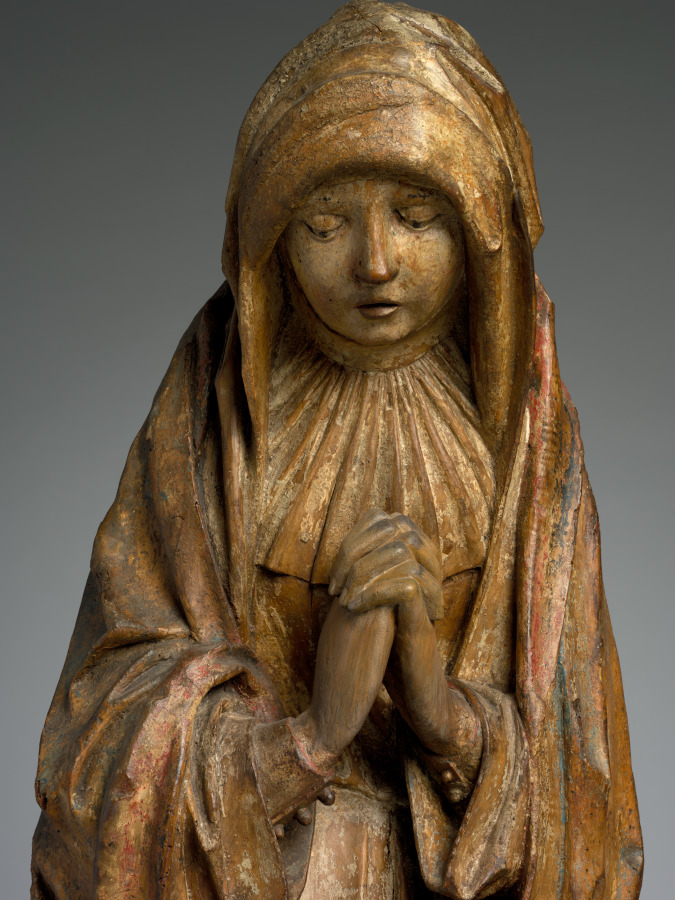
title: Virgin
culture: France, Champagne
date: 1510–15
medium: painted oak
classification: Sculpture